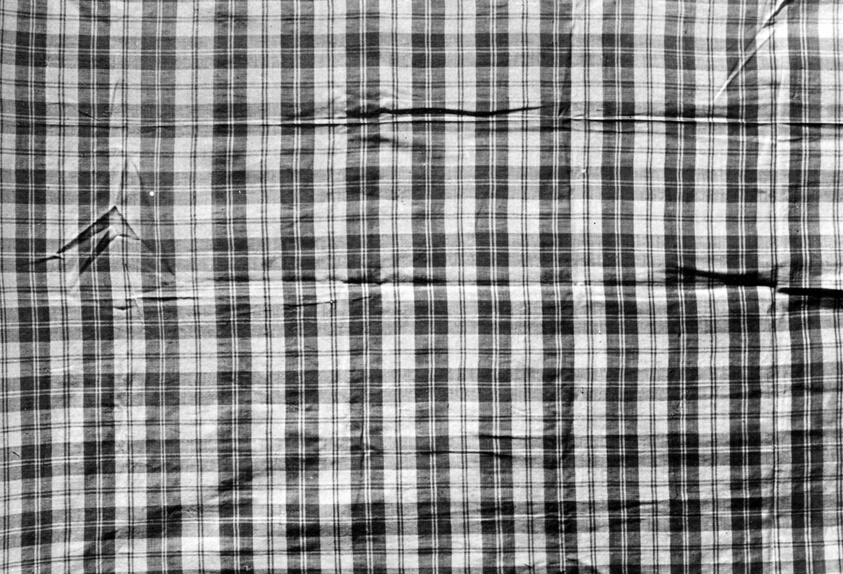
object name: Textile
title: Panel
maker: Woven by Marandy Merrill Hobbs (American, 1791-1871); United States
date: 19th century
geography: United States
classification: textile; weaving - printed